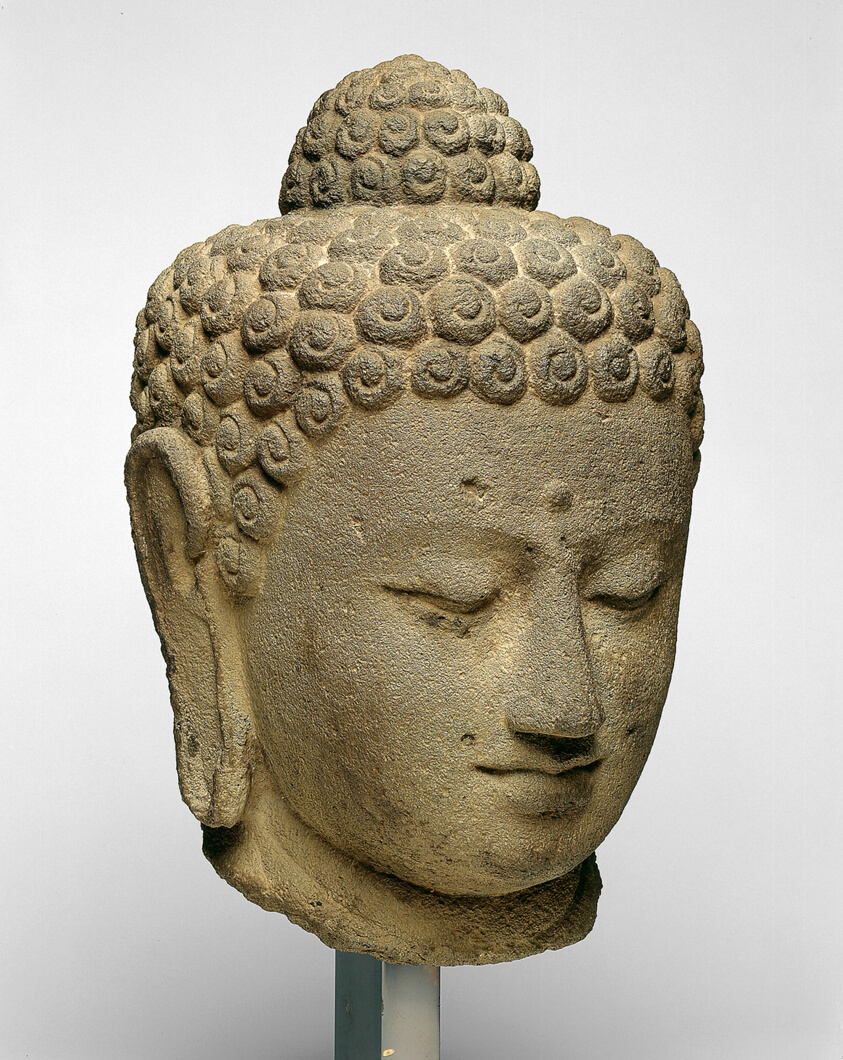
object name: Sculpture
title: Head of Buddha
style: Southeast Asian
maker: Indonesia; Central Java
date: 9th century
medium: Andesite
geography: Central Java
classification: stone; sculpture; asian art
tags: Buddha